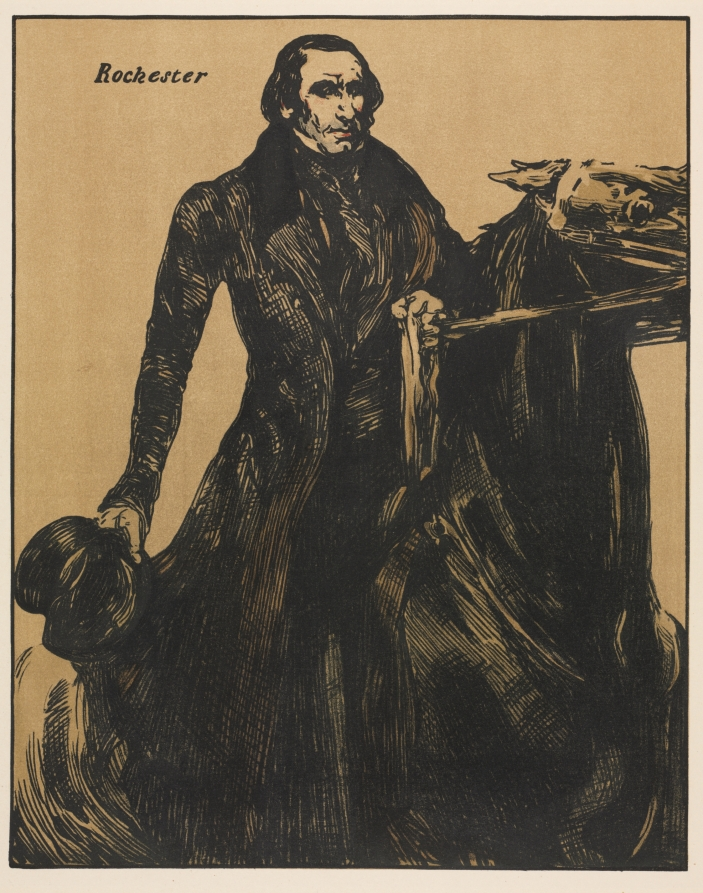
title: Characters of Romance: Rochester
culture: England, early 20th century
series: a portfolio of 16 lithographs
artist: William Nicholson (British, 1872–1949)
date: 1900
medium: color lithograph with hand coloring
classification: Print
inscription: Verso, top right, in pencil (not artist's hand): "189496"